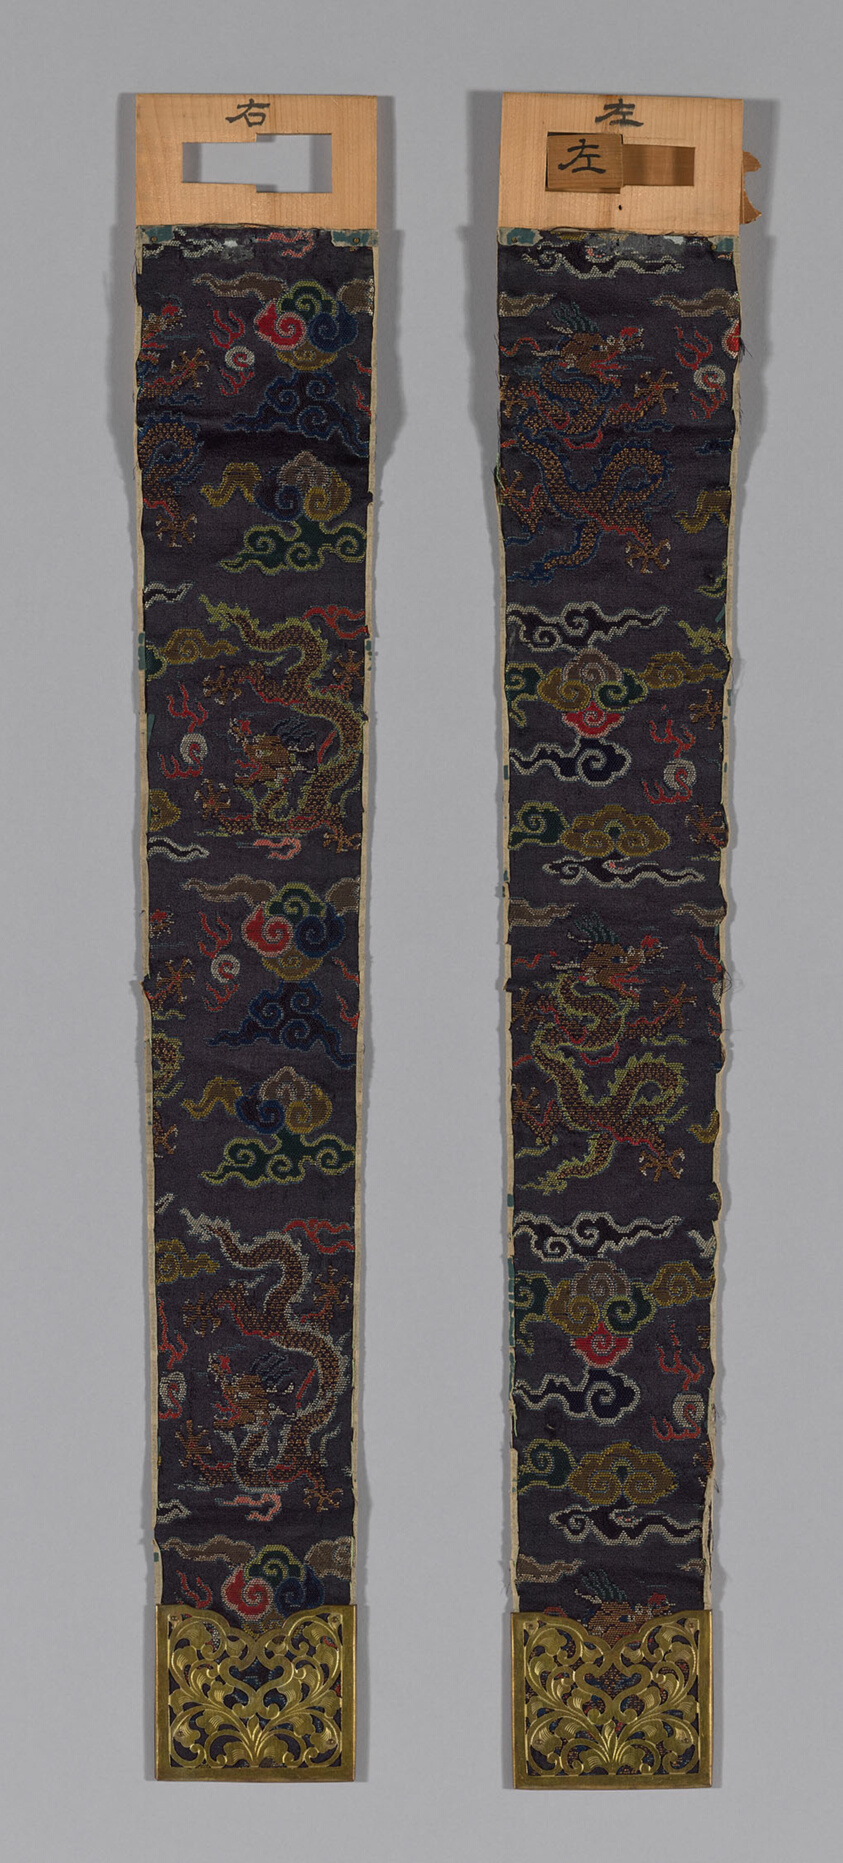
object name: Textile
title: Pendant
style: Japanism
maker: Japan, early Meiji period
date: 1870/90, Meiji period (1868–1912)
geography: Japan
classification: liturgical - buddhist; textile